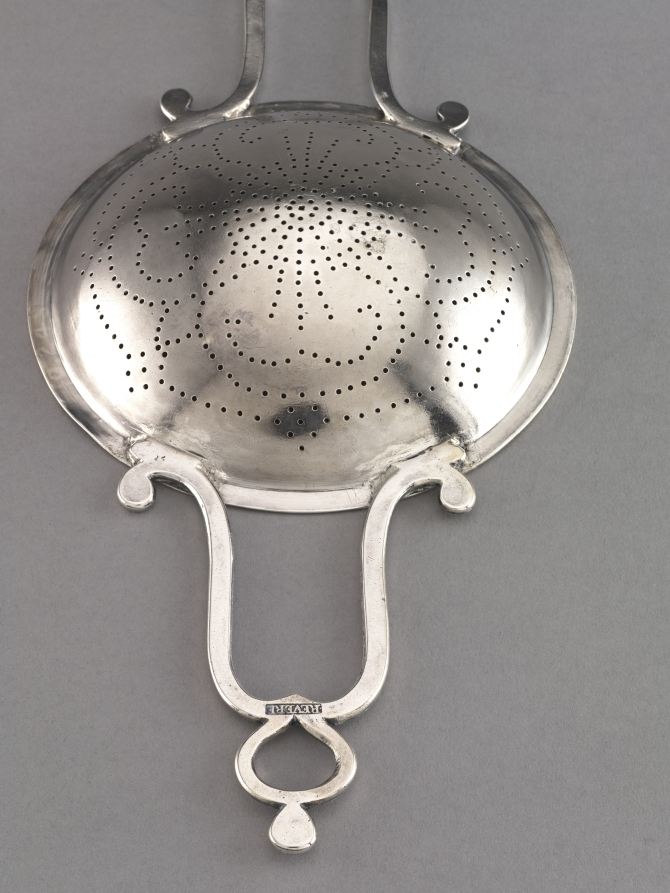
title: Strainer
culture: America, Massachusetts, Boston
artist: Paul Revere II (American, 1735–1818)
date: c. 1760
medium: silver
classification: Silver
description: A strainer was used to remove lemon seeds, cloves, and other debris from punch.